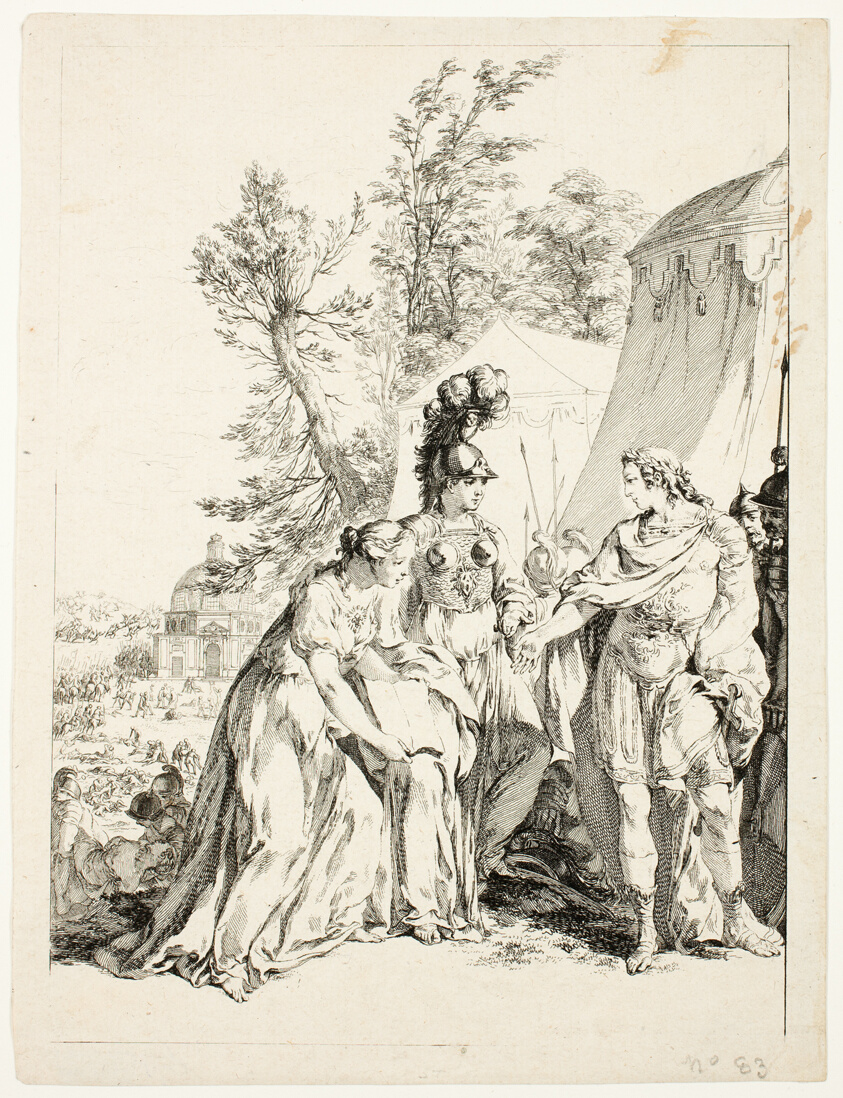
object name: Print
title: Allegory of Surgery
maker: Charles-Nicholas Cochin, the younger (French, 1715-1790)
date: 1741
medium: Etching on ivory laid paper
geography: France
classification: etching; print; prints and drawing